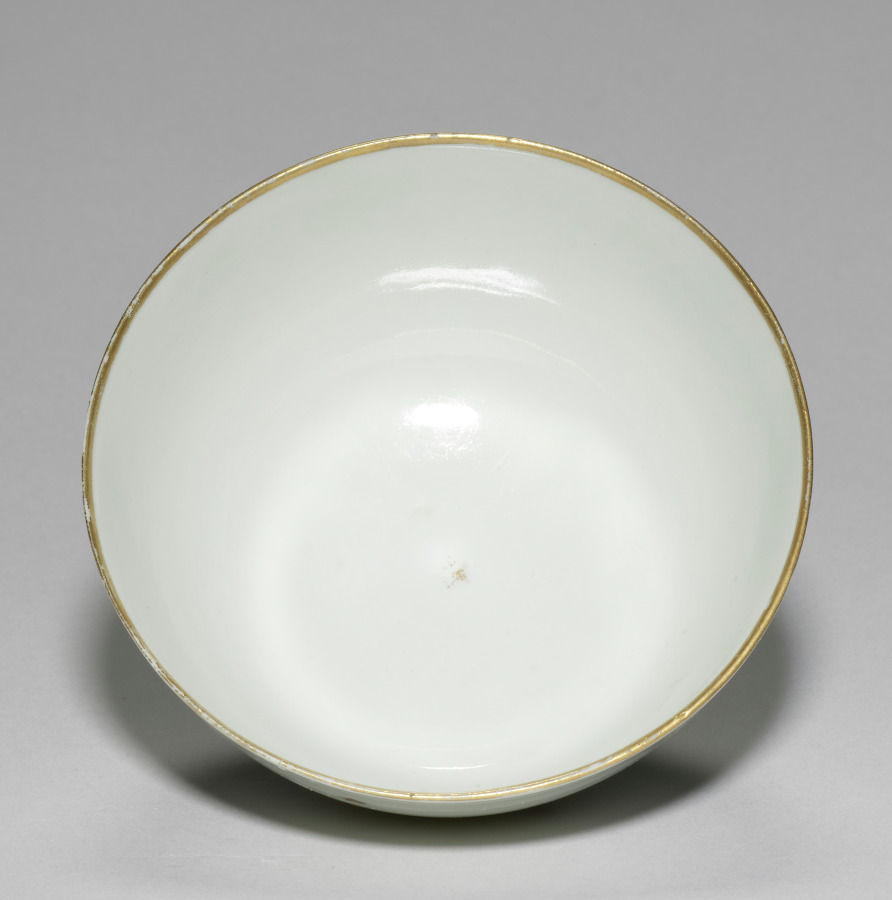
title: Cup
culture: China, Chinese Export, 19th century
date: 1800s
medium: porcelain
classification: Ceramic